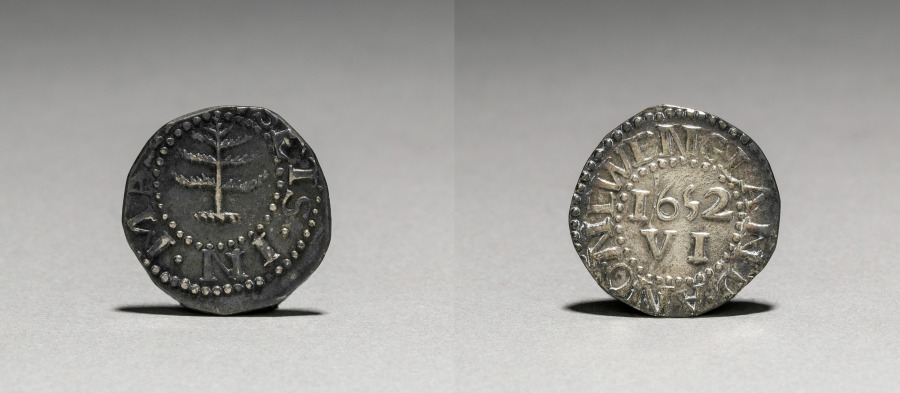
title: Sixpence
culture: America, Massachusetts, Boston, 17th century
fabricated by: John Hull (American, 1624–1683)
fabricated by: Robert Sanderson (American, 1609–1693)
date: 1652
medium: silver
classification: Coins